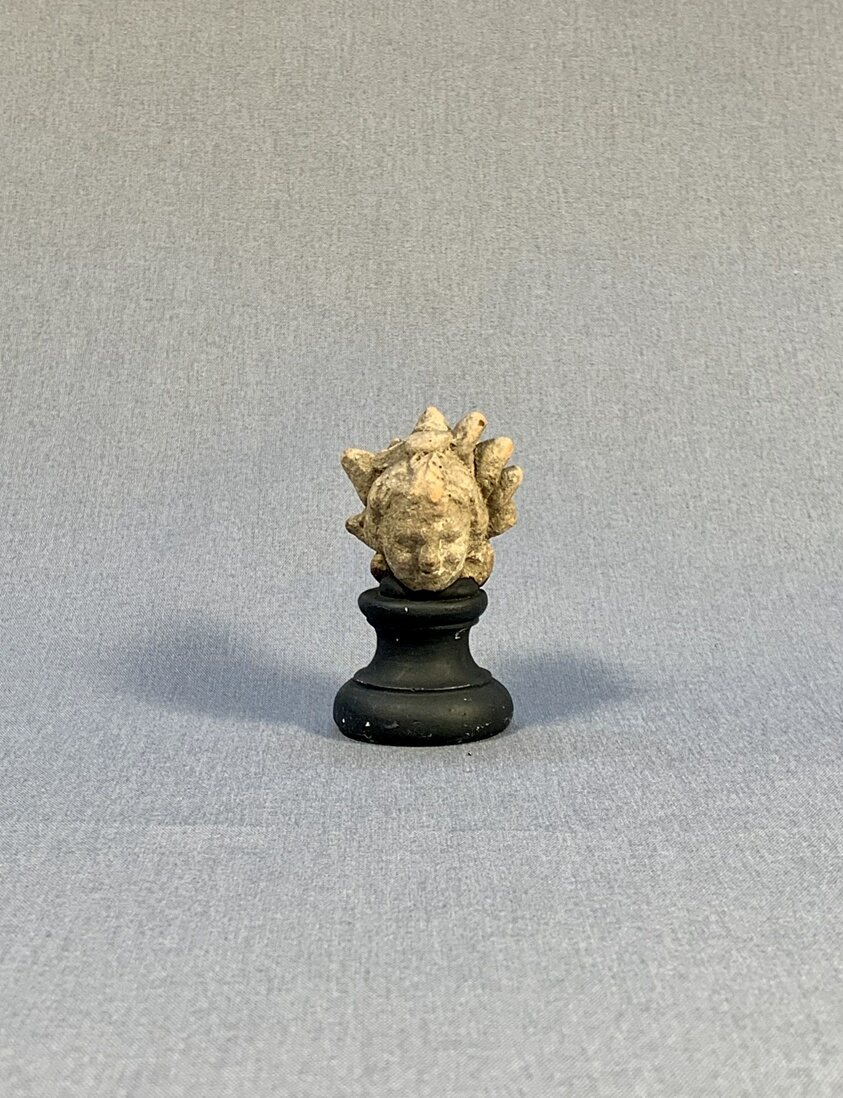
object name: Sculpture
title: Head of a Child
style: greek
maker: Greek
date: 2nd-1st century BCE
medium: terracotta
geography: Greece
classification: earthenware; ceramics; sculpture; ancient art